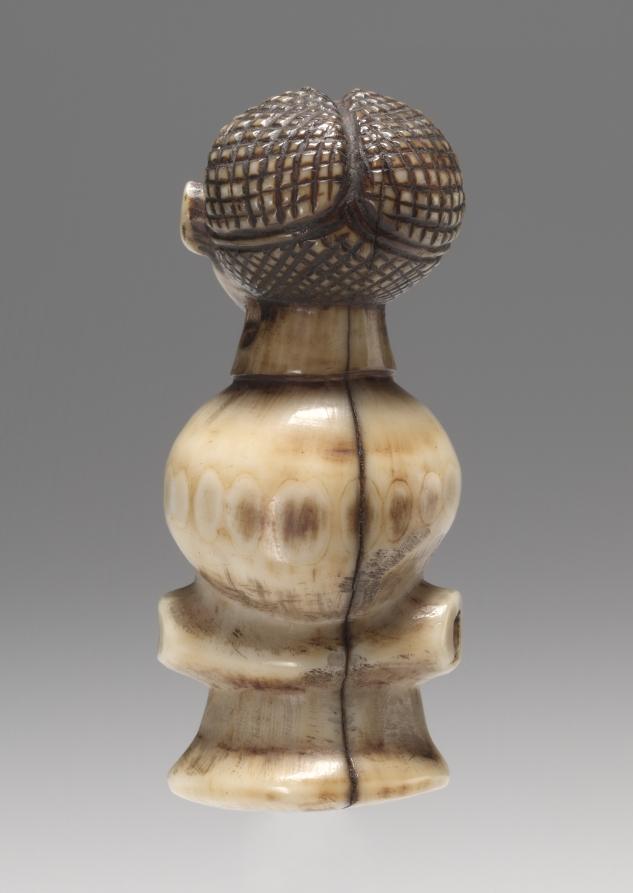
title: Whistle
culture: Central Africa, Democratic Republic of Congo or Angola, Chokwe people, late 1800s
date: late 1800s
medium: Probably hippopotamus ivory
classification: Musical Instrument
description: This was the first sculptural work from Africa to enter the CMA's collection.